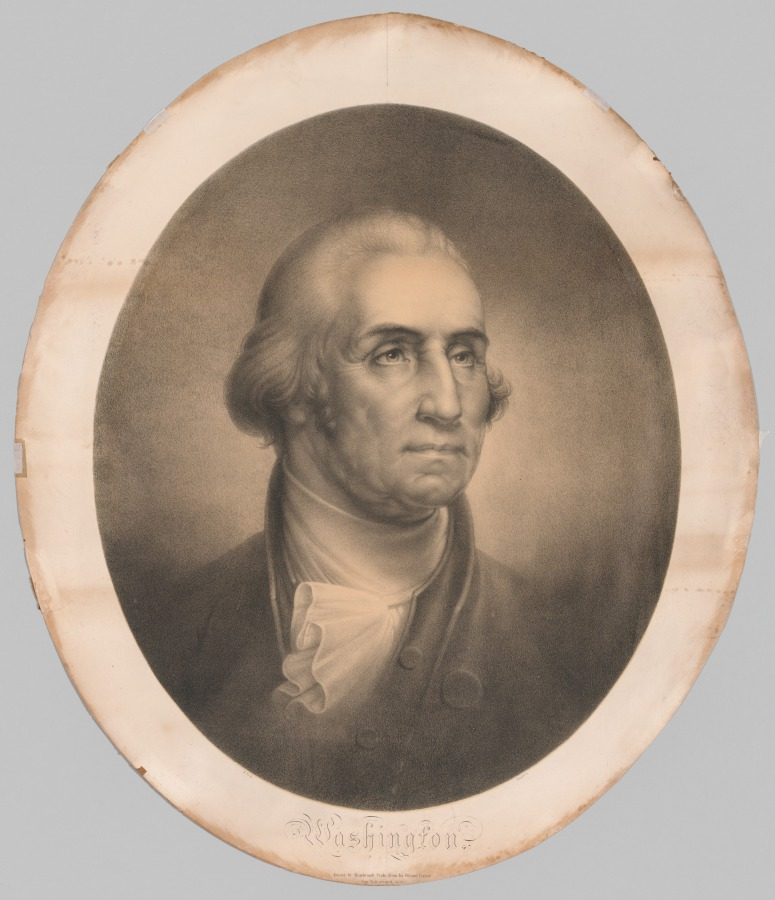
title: Head of George Washington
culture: American, 19th century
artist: Rembrandt Peale (American, 1778–1860)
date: 1856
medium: lithograph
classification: Print